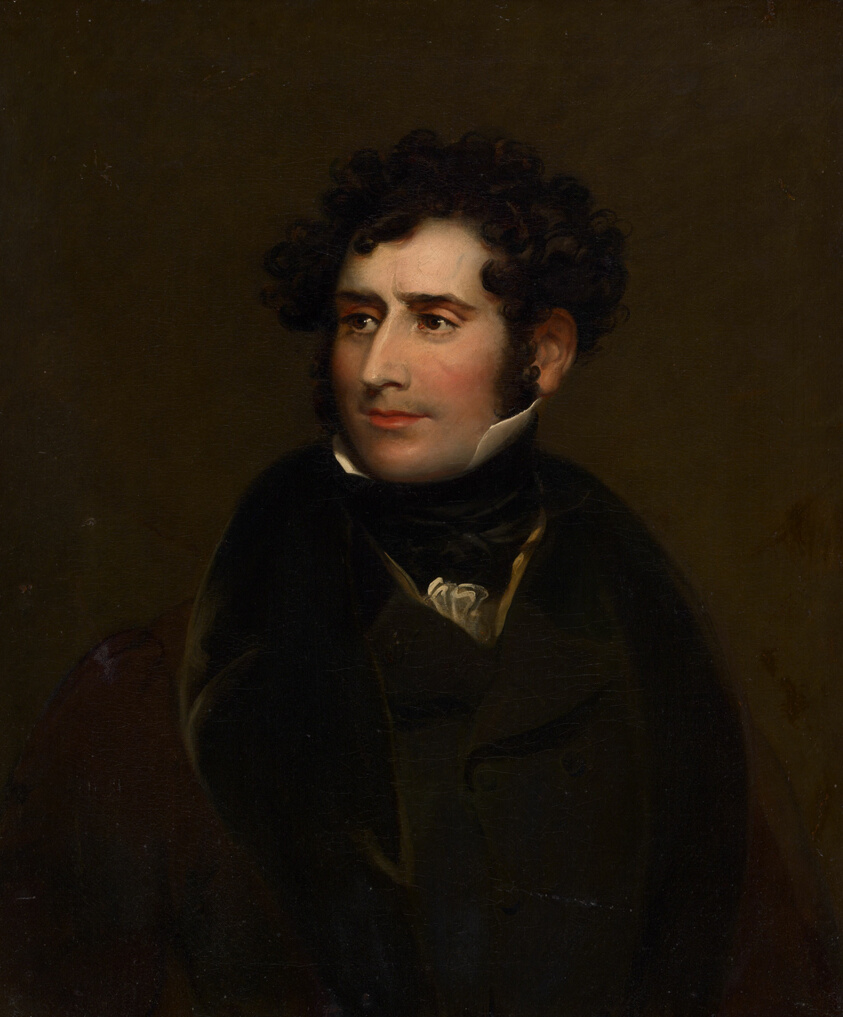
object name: Painting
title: James William Wallack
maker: Charles Robert Leslie (American, born England, 1794–1859)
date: 1835–40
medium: Oil on canvas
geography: United States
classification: painting; american arts